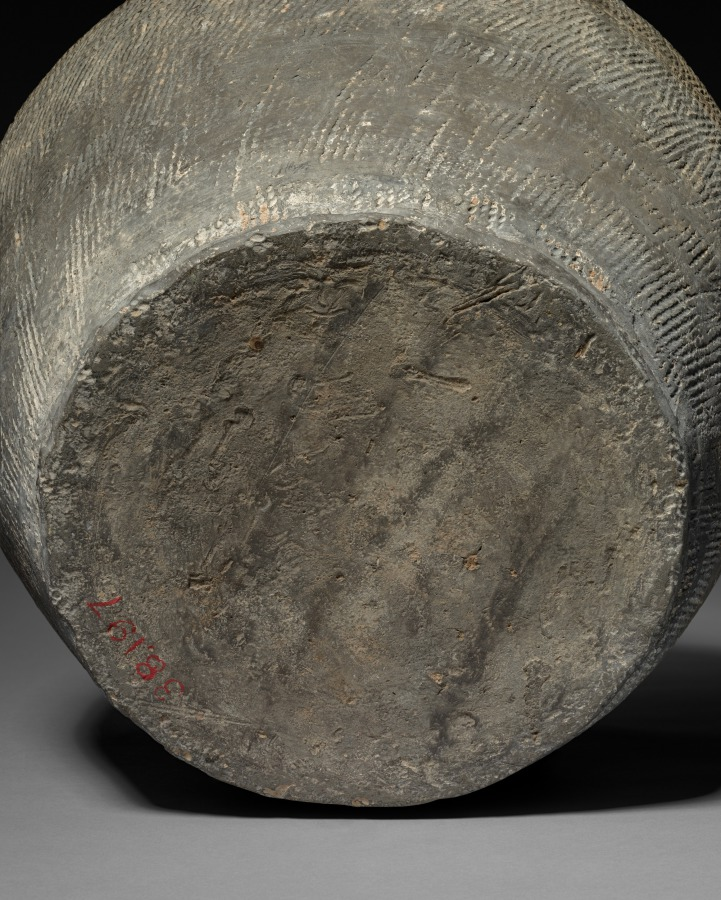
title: Jar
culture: China, Hunan province, reportedly Changsha, Eastern Zhou dynasty (770–256 BCE), Warring States period (475–221 BCE)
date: 481–221 BCE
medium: earthenware with impressed and incised decoration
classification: Ceramic